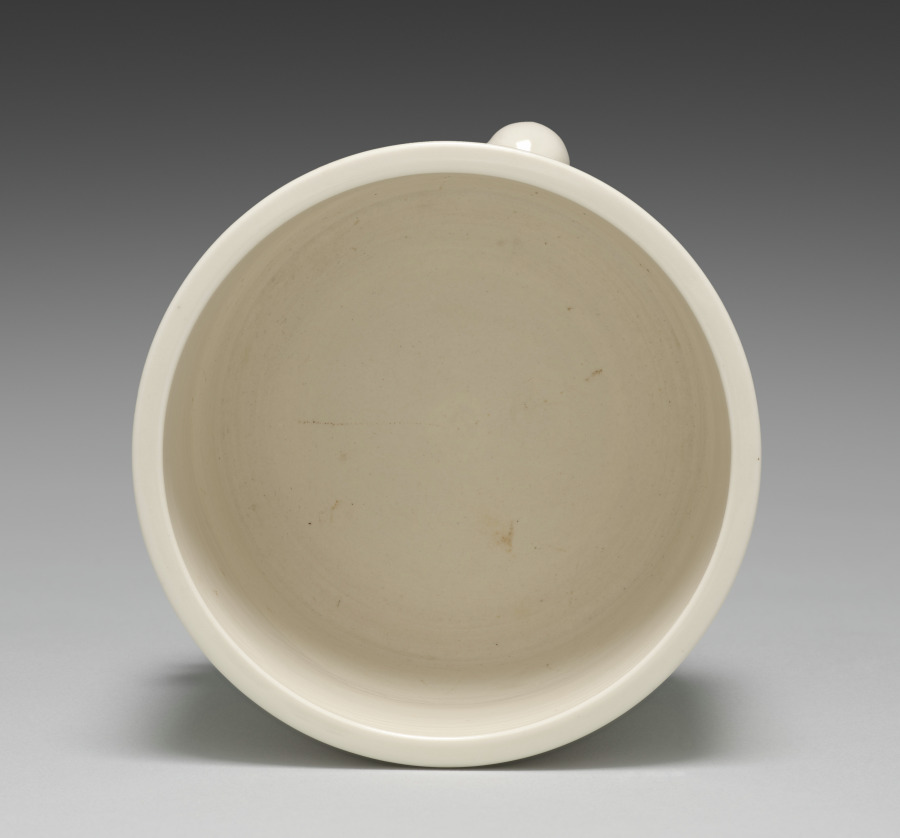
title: Incense Burner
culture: Japan, Meiji period (1868–1912)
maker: Seifū Yohei III (Japanese, 1851–1914)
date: 1893–1914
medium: Porcelain with creamy white glaze and molded design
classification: Ceramic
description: Yohei III made incense burners in a wide variety of designs and styles. The body and glaze of this one are taihakuji, or “great white porcelain,” an important early invention Yohei III devised in 1872 that involved the combination of a distinctive translucent, creamy glaze over an ivory-colored clay body. The burner has rounded, cabriole legs, resembling tiny table legs, attached to the exterior. Lids were produced outside the studio by metalwork specialists. For this incense burner, they created a floral-patterned silver lid.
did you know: There is the faintest decorative band around the bottom of the incense burner.